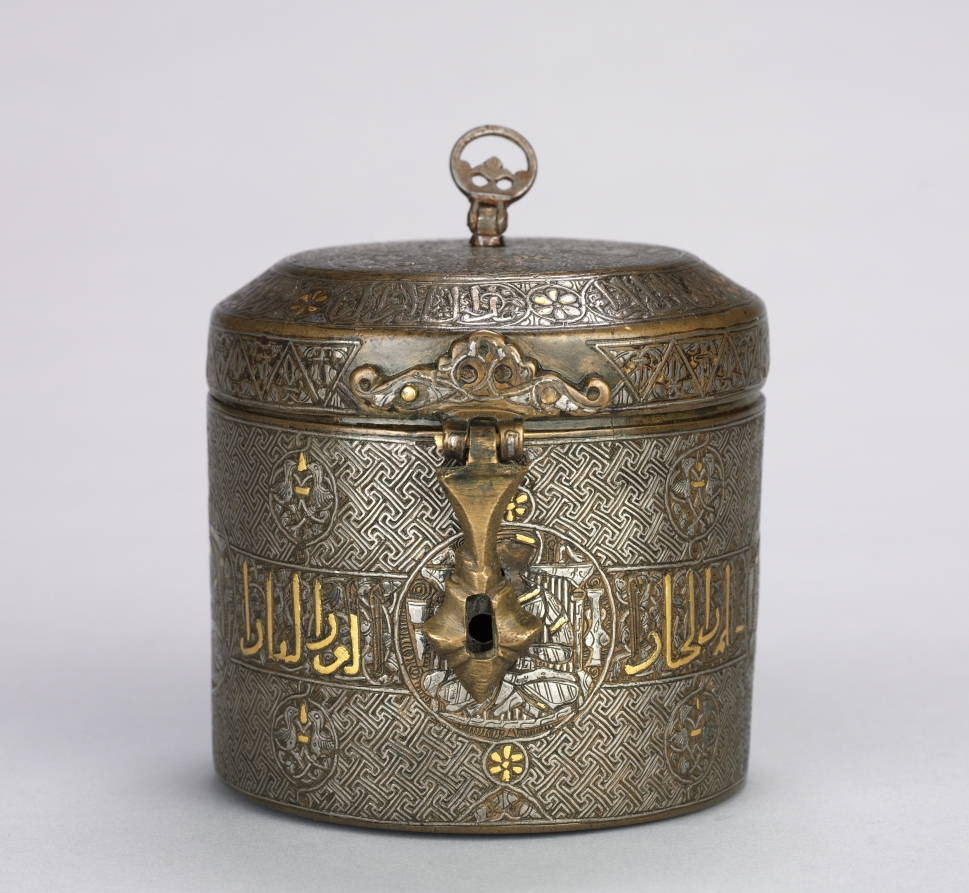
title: Luxury Inlaid Container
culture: Northern Iraq, Ayyubid period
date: c. 1250–1350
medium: sheet brass, inlaid with silver and gold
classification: Metalwork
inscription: Band around body (naskh): "Lasting glory, and safe life, and increasing prosperity, [and] nobility, [and] effective authority"; band around body (naskh): "Brilliance, and nobility, and patience, and modesty, and glory, and long life, and piety, and patience"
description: Metalwork flourished in the 1200s with production centers in Mosul, Damascus, and eastern Anatolia. Along with this container, the nearby ewer and candlestick are examples of the superb pieces produced at this time. Scenes of court life, including banqueting, music, and enthroned figures, decorate the sides and top of the container. The lid is covered in hexagonal swastikas, an ancient solar motif, which is further enhanced by a large sunburst in the center. The calligraphic inscriptions extend wishes for a long life, prosperity, and patience to the owner.